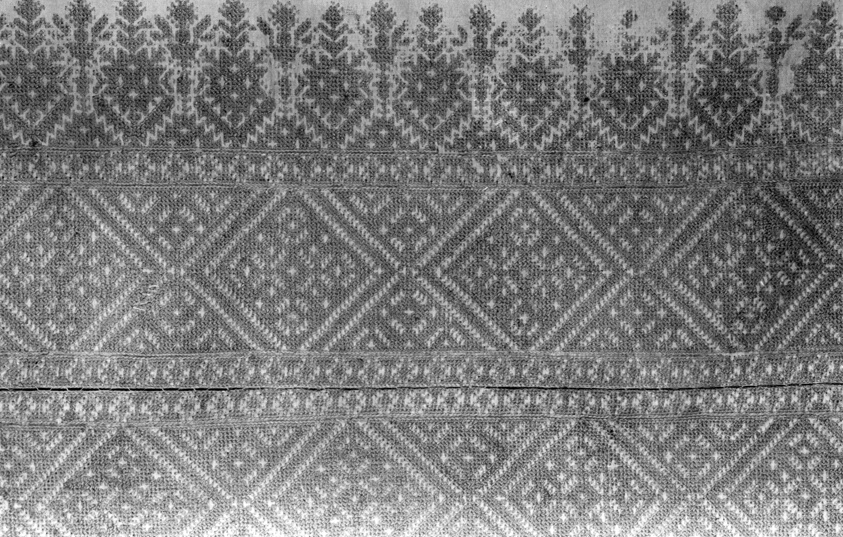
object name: Textile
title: Fragment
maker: Morocco, Fès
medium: Silk embroidery on plain, cream-colored cotton cloth. Stitch: Holbein stitch over four threads, stem stitch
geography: Morocco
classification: textile; needlework (visual works); weaving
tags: morocco